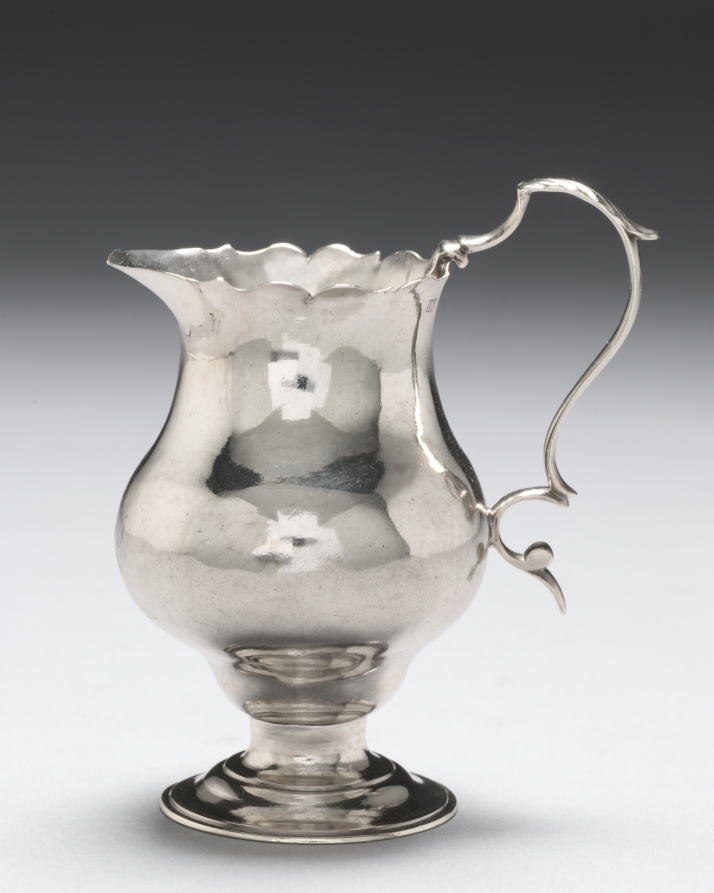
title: Cream Pitcher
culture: America, Massachusetts, Boston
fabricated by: Paul Revere II (American, 1735–1818)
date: c. 1765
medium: silver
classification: Silver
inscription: "P . . .H/to/P . . .E" in block letters under foot, and "MHP" in bright-cut script on front, opposite handle.